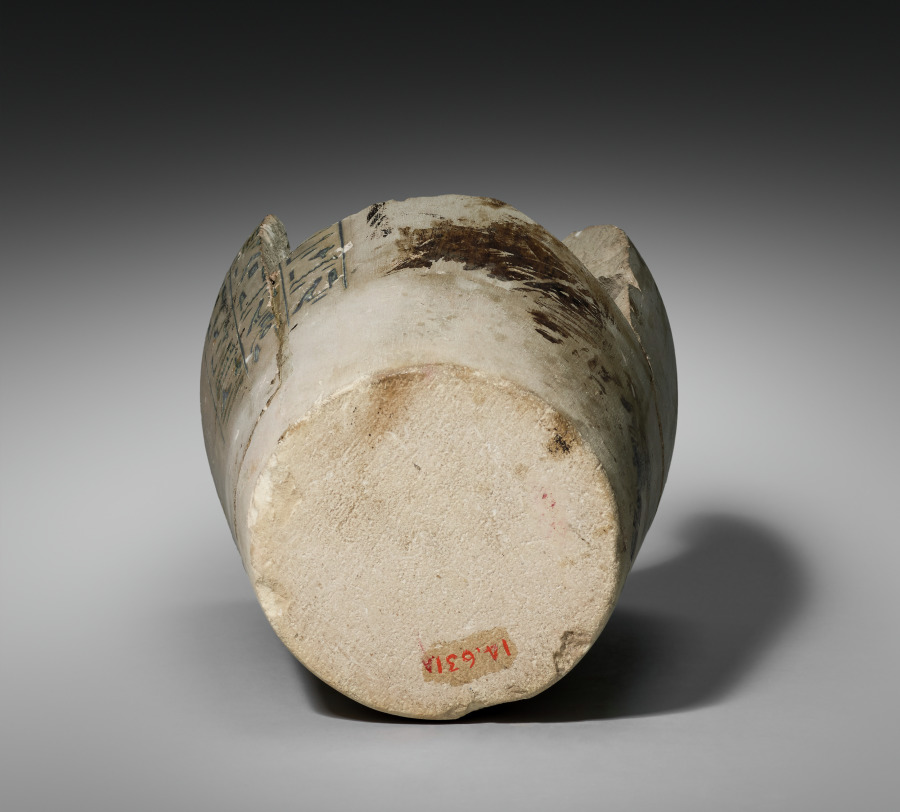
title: Canopic Jar with Lid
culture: Egypt, New Kingdom (1540–1069 BCE), Dynasty 18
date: 1540–1296 BCE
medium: limestone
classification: Funerary Equipment